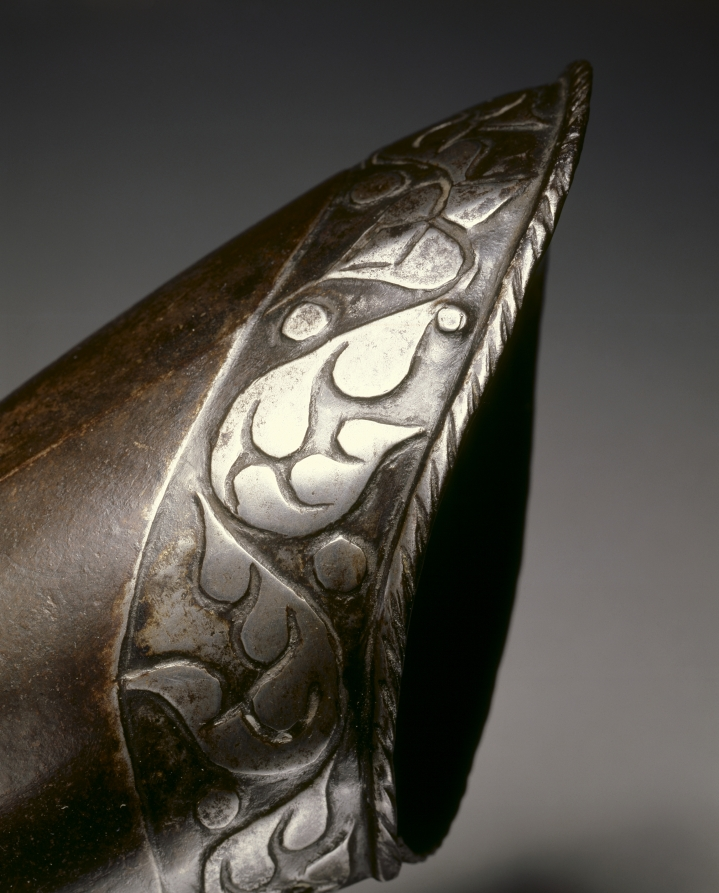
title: Black and White Elbow Gauntlet for the Right Hand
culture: North Germany, 16th century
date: c.1570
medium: steel, blackened with leather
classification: Arms and Armor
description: Plate armor alternately decorated with brightly polished ("white") and darkened ("black") surface areas is commonly referred to as "black and white" armor. The black color results from painting the surface areas, or merely leaving them dark from the forging process. The gauntlet here has been further embellished with an embossed cuff. The 1500s saw the revival of this ancient technique also known as repoussé. First the pattern is drawn onto the surface and then hammered and punched from the inside to gradually shape the desired raised design on the outer surface of the metal. This technique was reserved for only the costliest of armors.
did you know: To throw a gauntlet or armored glove at the feet of your enemy or opponent was a grave insult, one only to be matched with personal combat. This is where we get the modern phrase "throw down the gauntlet."